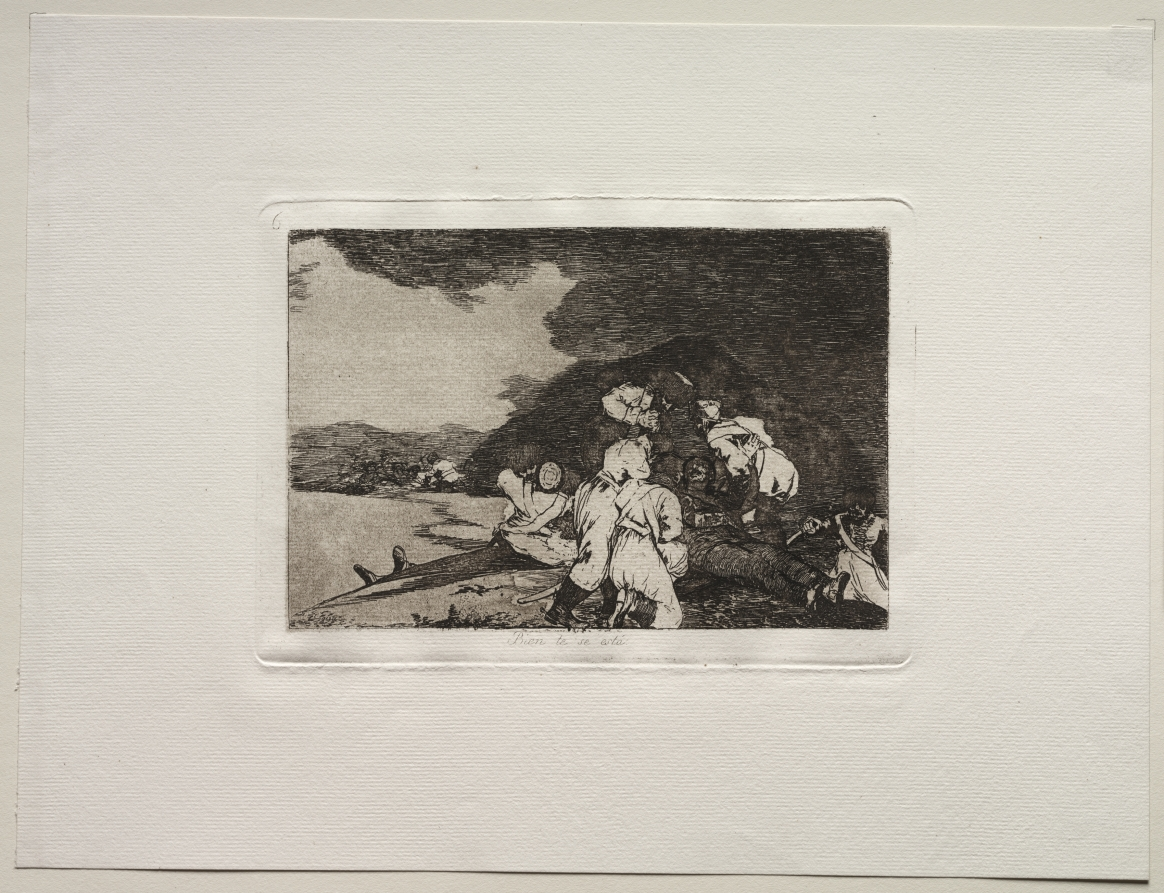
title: The Horrors of War: It Serves You Right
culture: Spain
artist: Francisco de Goya (Spanish, 1746–1828)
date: c. 1810–20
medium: etching and aquatint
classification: Print